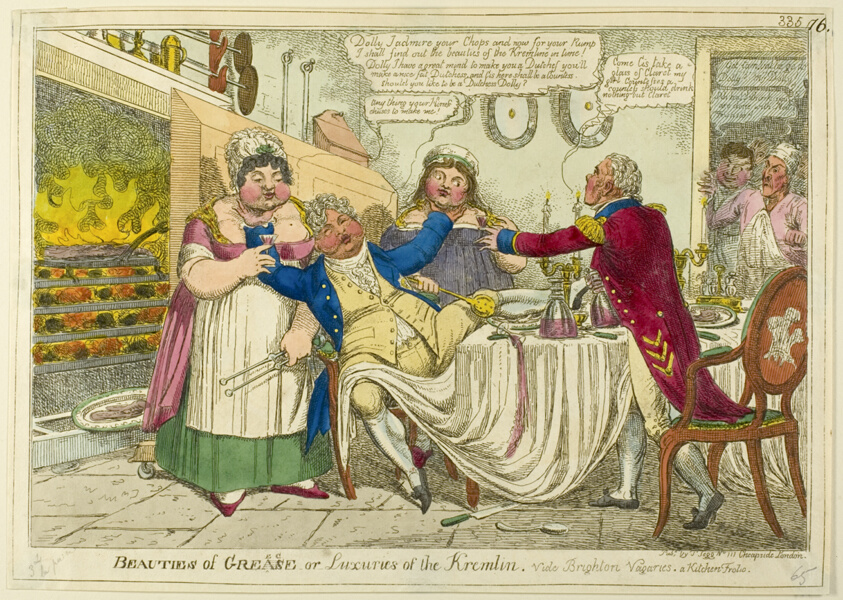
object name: Print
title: Beauties of Grease [altered to] Greece — or — Luxuries of the Kremlin. Vide Brighton Vagaries. A Kitchen Frolic.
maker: Isaac Robert Cruikshank (English, 1789-1856); published by Thomas Tegg (English, 1776-1845)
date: c. 1819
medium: Hand-colored etching on ivory wove paper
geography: England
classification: etching; print; prints and drawing